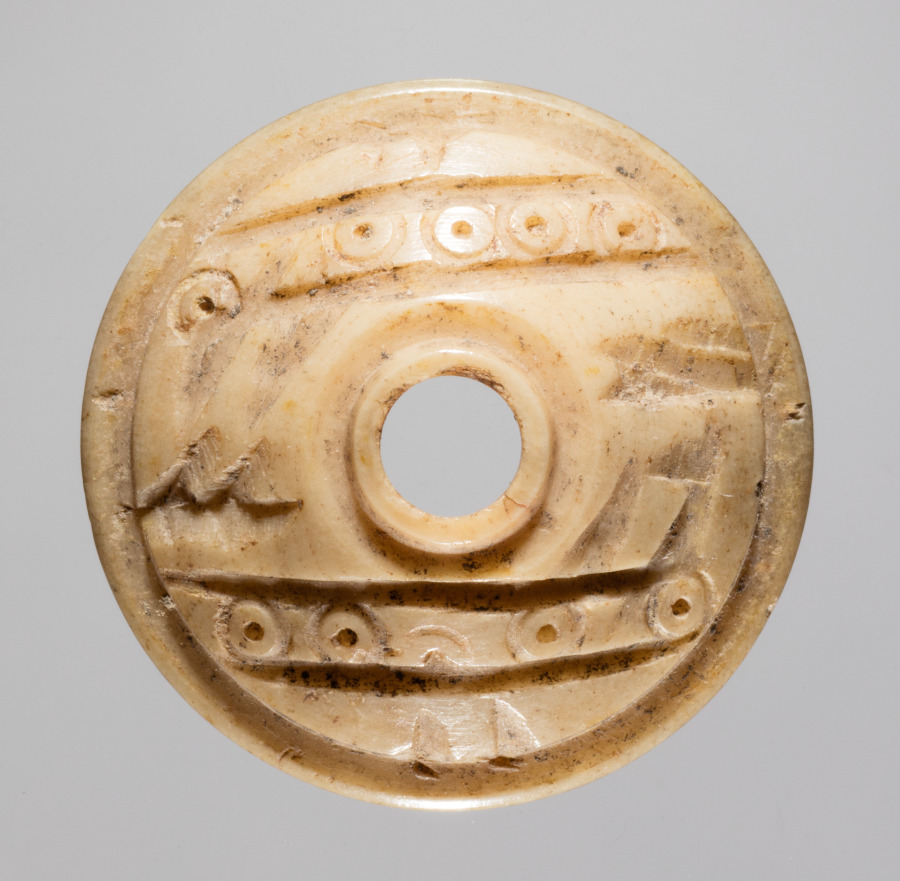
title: Spindle Whorl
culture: Iran, early Islamic period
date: 700s - 900s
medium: bone, incised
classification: Spindle Whorl